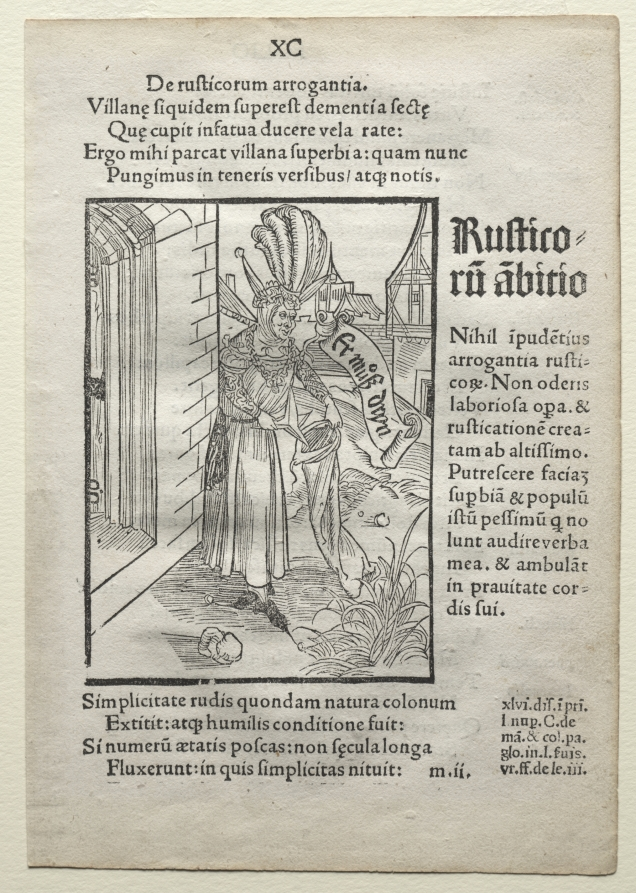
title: Ship of Fools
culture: Germany, late 15th Century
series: Latin Edition: Stultifera Navis ; Das Narrenschiff (Ship of Fools) by Sebastian Brant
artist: Albrecht Dürer (German, 1471–1528)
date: after 1497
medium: woodcut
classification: Print